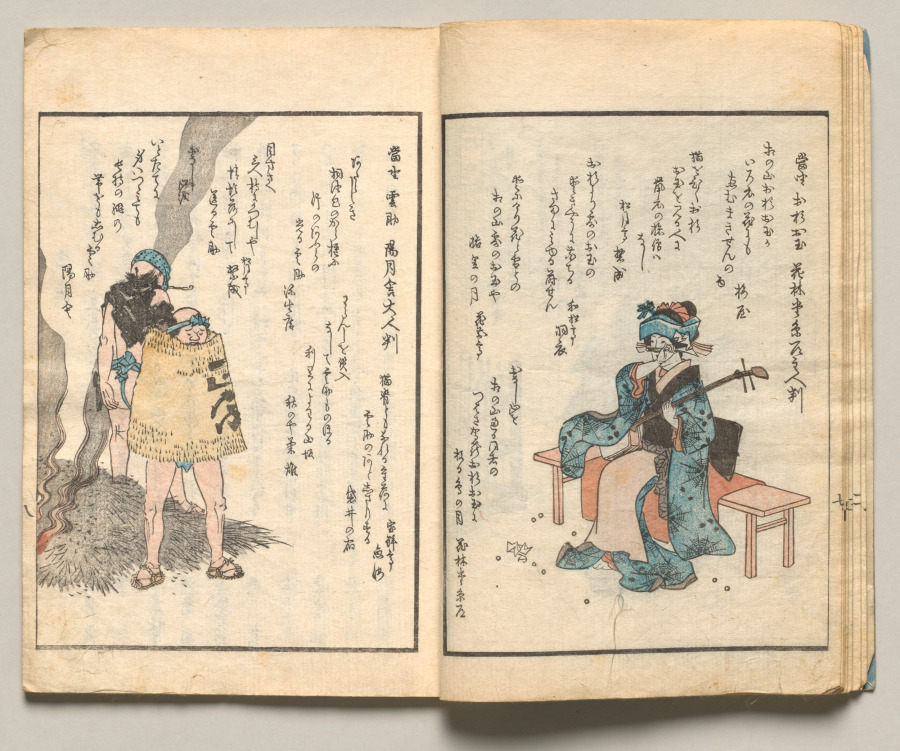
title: Spread Eight from Volume Three of People of Japan in Light Verse (Kyōka)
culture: Japan, Edo period (1615–1868)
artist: Utagawa Hiroshige (Japanese, 1797–1858)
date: 1857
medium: Woodblock-printed book; ink and color on paper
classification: Bound Volume